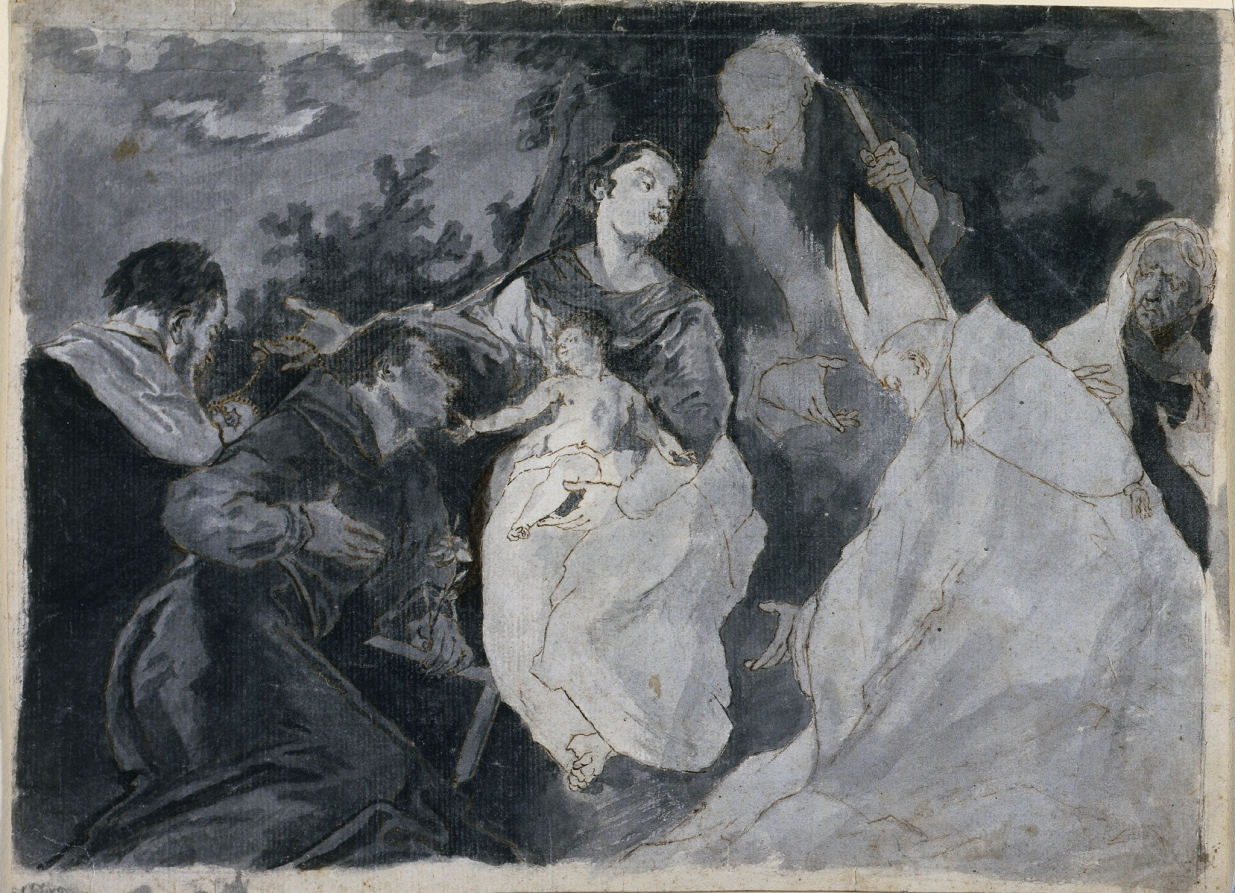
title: Madonna and Child with Saints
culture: Italy, 18th century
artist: after Giuseppe Bazzani (Italian, 1690–1769)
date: 1700s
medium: pen and brown ink and brush and gray wash, with traces of black chalk and brush and brown wash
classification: Drawing